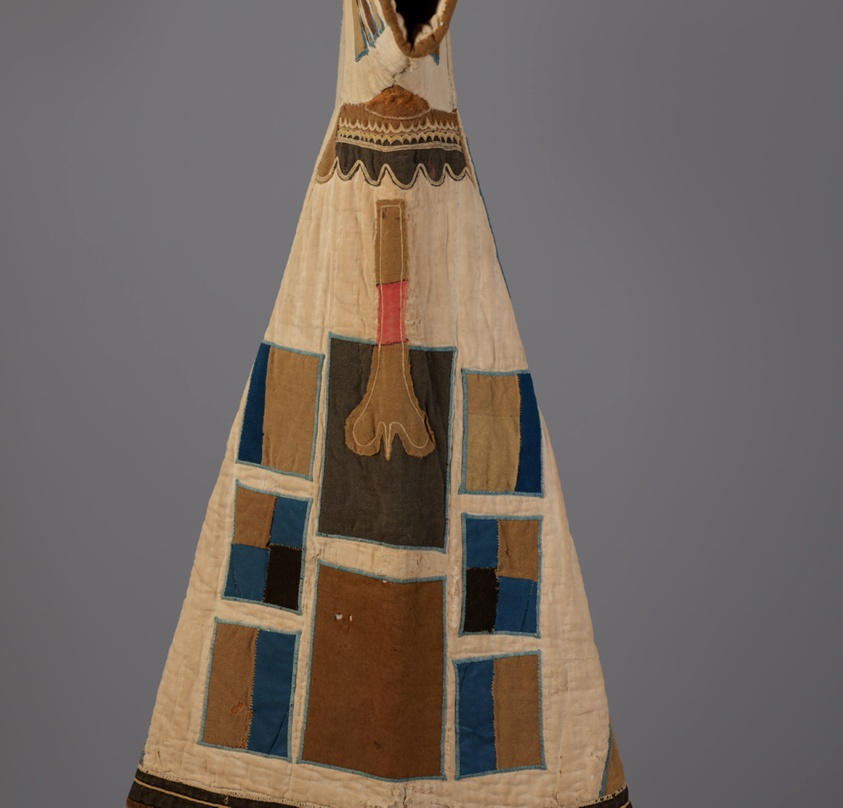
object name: Costume and Accessories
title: Tunic (Jibbeh)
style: Arts of Africa, 19th century, east african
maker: Mahdiyya State, Sudan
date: 1885/99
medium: Layers of cotton, plain weave; pieced and quilted; appliquéd with wool and wool and cotton plain weaves and wool twill weaves; embroidered with cotton in chain, cross, and a derivative of herringbone stitches; applied plied yarn edging; lined with cotton plain weaves; pieced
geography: Sudan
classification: tunic; arts of Africa; costume; garment; textile; dress (garment)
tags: garment, rectangles, black (color), tan (color), brown (color), lines, colonialism, Freedom, military, military uniforms, soldiers, uniforms